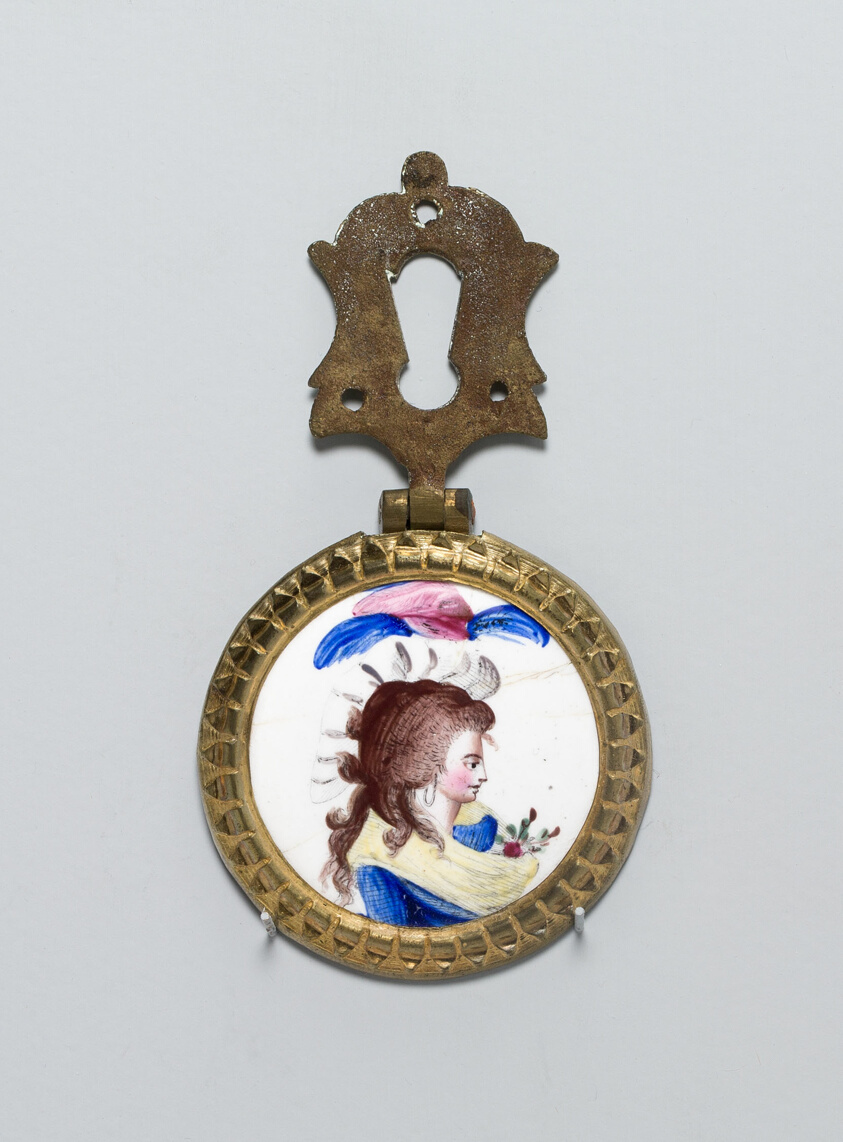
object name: Metalwork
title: Cloak Pin (Knob or Tieback)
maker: England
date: 1810/30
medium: Copper, transfer printed and polychrome enamel, gilt bronze, and iron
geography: England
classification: costume accessory worn above the waist; enamel; pin (jewelry); metalwork